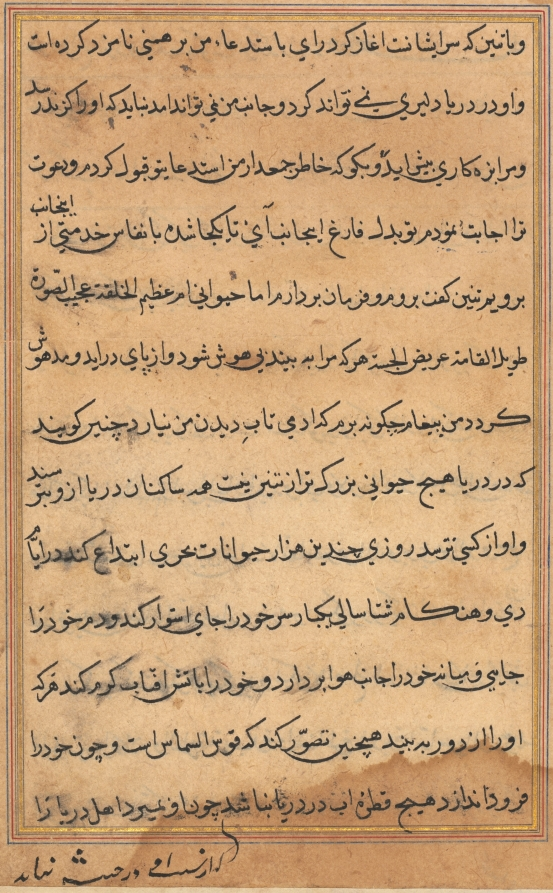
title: Page from Tales of a Parrot (Tuti-nama): text page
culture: Mughal India, court of Akbar (reigned 1556–1605)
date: c. 1560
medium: gum tempera, ink, and gold on paper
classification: Painting